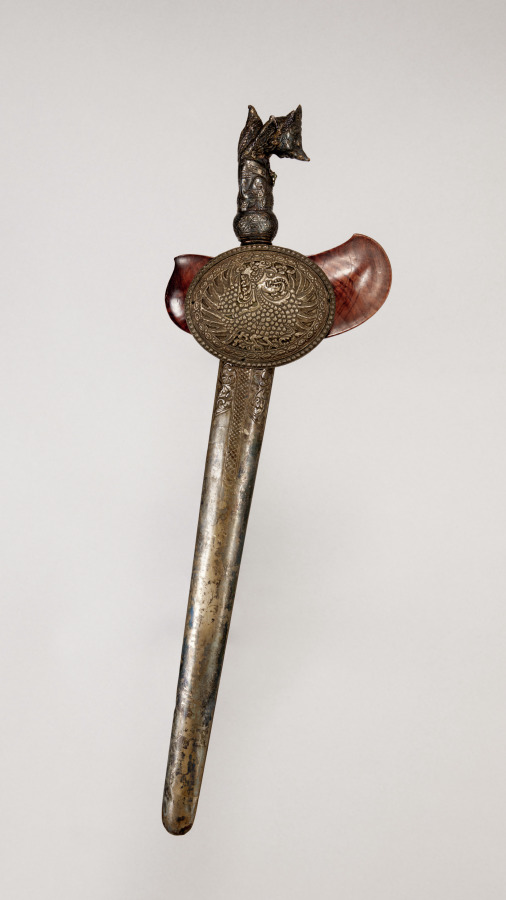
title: Sword (Kris)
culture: Java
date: 1800s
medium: iron and silver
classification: Arms and Armor